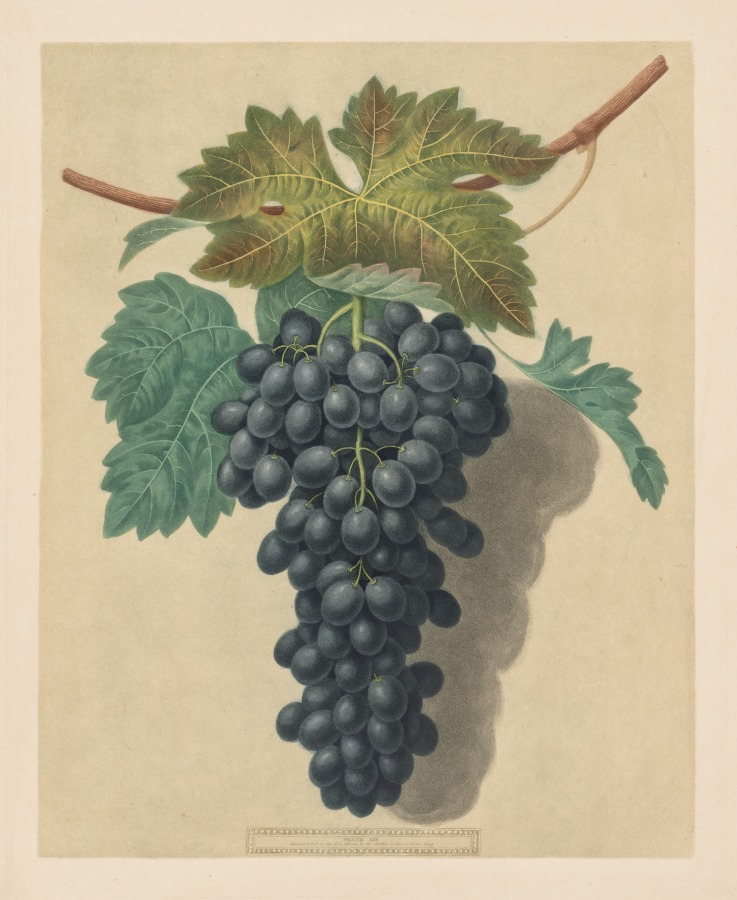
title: Pomona Britannica: No. 52 - Black Prince Grape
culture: England, 19th century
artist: George Brookshaw (British, 1751–1823)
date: 1809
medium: aquatint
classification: Print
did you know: Botanically, grapes are considered berries; in fact, the Old English term “berie” described what are now called grapes.